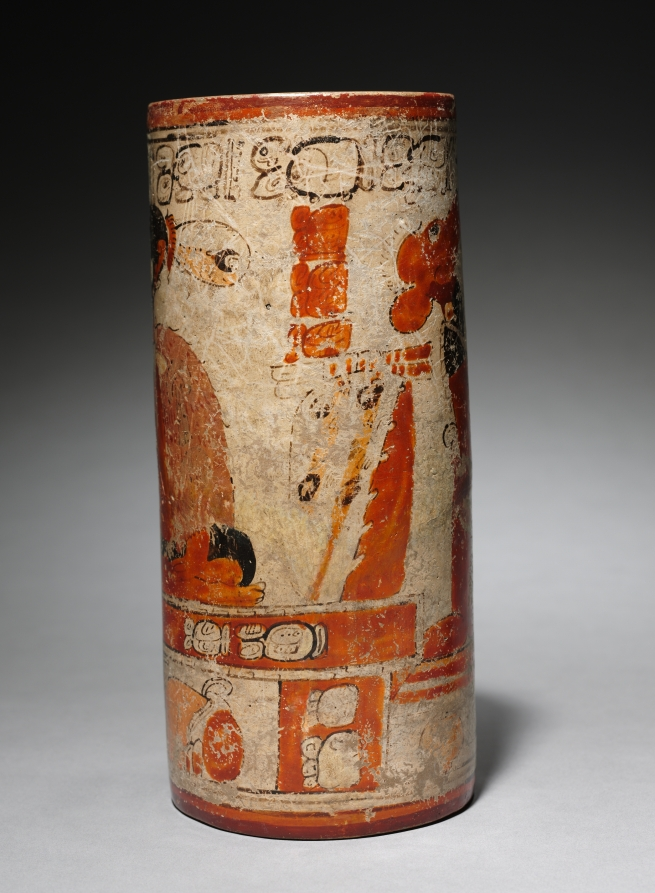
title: Painted Vase with Ruler and Scribe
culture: Guatemala, Northern Peten or Mexico, Southern Campeche, Maya, late Classic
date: 600–900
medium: pottery with burnished, colored slips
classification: Ceramic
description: Among Maya noble families, finely painted ceramic vessels were used as fancy tableware, treasured gifts that secured the support of allies, and funerary offerings placed in tombs. Accordingly, the vessels’ imagery varies from religious themes to scenes of courtly life. Here, two attendants kneel before an enthroned nobleman who wears an enormous bird-head headdress.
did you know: A string of death glyphs below the rim departs from the Primary Standard Sequence.